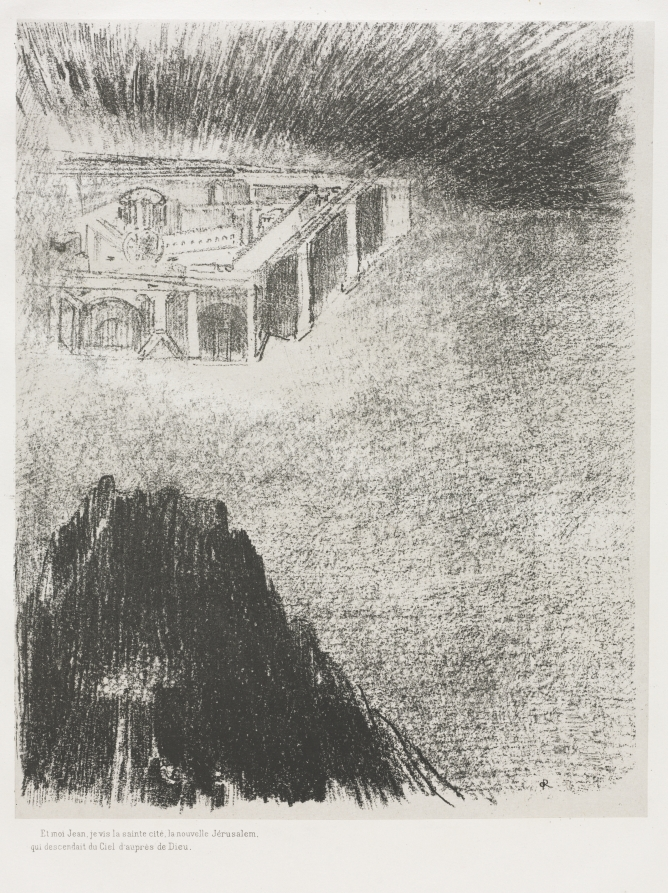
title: And I, John, Saw the Holy City, New Jerusalem, Coming Down from God and out of Heaven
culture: France, late 19th Century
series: The Apocalypse of Saint John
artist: Odilon Redon (French, 1840–1916)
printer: Blanchard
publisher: Ambroise Vollard (French, 1867–1939)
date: 1899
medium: lithograph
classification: Print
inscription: initialed on stone at lower right: OR; printed at lower left below image: Et moi, Jean, je vis la sainte cité, la nouvelle Jérusalem, / qui descendait du ciel, d'auprès de Dieu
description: The last of Odilon Redon’s 11 lithographic portfolios, this series relates to the Book of Revelation from the Christian Bible. The subject had been explored throughout art history, allowing the artist to align himself with past masters, such as Albrecht Dürer. Although Redon often vaguely referenced texts, these prints directly illustrate 12 individual passages, including one about a woman clothed with the sun and another focused on a great star falling from heaven. By the time he created this portfolio, Redon’s reputation was well established. The project was published by art dealer Ambroise Vollard, who began to sell and promote Redon’s work about a year earlier, building a market for his prints in Paris and abroad.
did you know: This is one of the last works where Redon experimented with lithograph and all-black medium. In contrast, bright, dazzling colors characterize his late works.